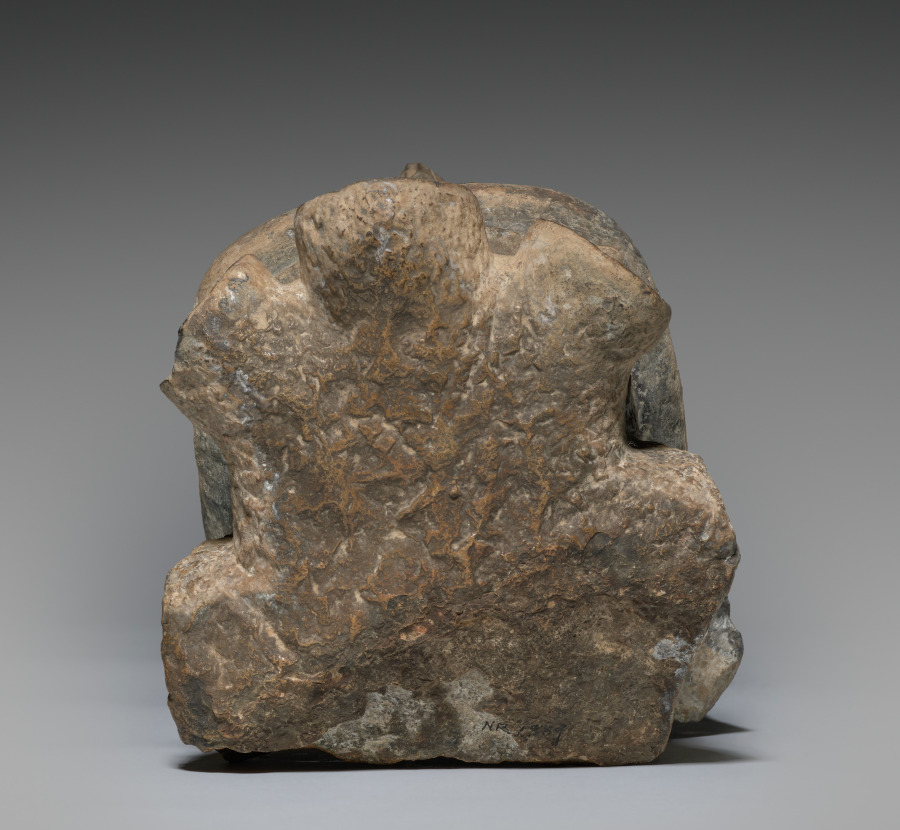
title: Head of Bodhisattva Guanyin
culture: China, Six Dynasties period (317-581), Northern Wei dynasty (386-534)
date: c. 510–520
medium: stone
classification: Sculpture